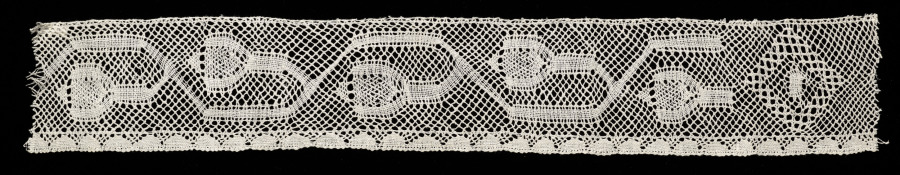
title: Lace Band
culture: Spain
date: 1800s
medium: Bobbin lace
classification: Lace